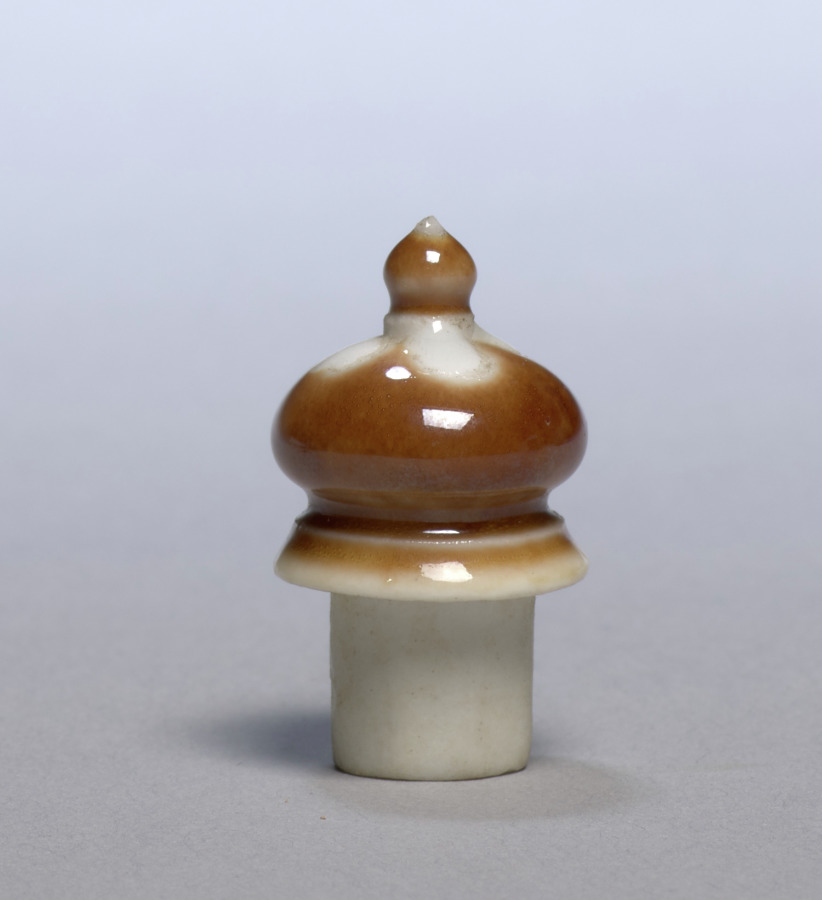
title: Cover for a Vase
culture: France, 20th century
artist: Sèvres Porcelain Factory (French, est. 1756)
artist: Taxile Maximin Doat (French, 1851–1939)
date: 1901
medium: porcelain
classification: Ceramic